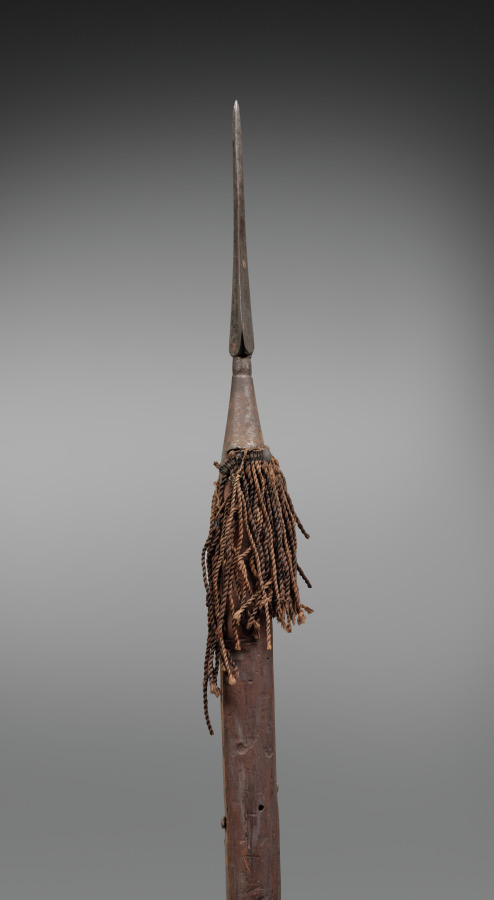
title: Pole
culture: Spain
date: 1700s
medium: wood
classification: Arms and Armor